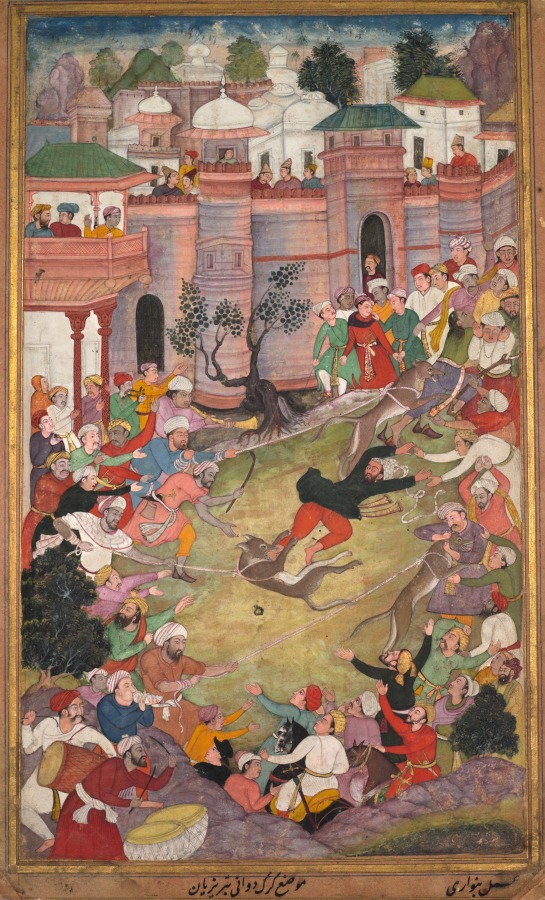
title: The game of wolf-running in Tabriz, from an Akbar-nama (Book of Akbar)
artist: Banavari 1 (Indian, active 1550s-1590s)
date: c. 1595–1600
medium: Gum tempera, ink, and gold on paper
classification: Painting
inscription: signed by Banwari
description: After four years of traveling in exile, fleeing Afghan forces, Humayun reached Tabriz, the glittering capital of the Safavid dynasty in northwestern Iran, here imaginatively rendered by the Indian artist. There the second Mughal emperor enjoyed warm hospitality extended by the shah of Iran, who called for a game of wolf-running for which the city was famous. Artists painting during the time of Akbar, late in his reign when historical subjects dominated, speculated as to how the game was played, based on eyewitness accounts. They gave the figures lively emotive expressions and gestures, and the dense crowding successfully conveys the pandemonium of the scene.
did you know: During extreme activities, turbans could come unwound and fall off.